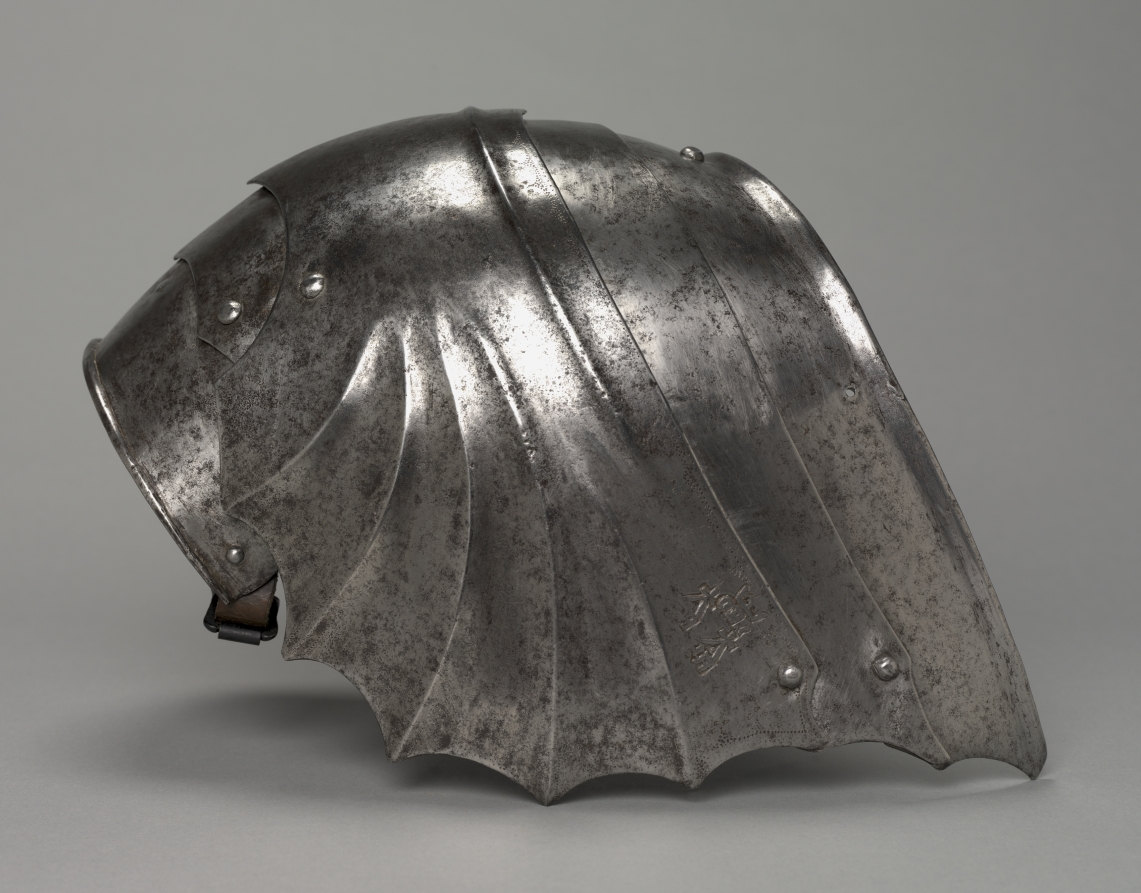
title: Gothic Fan-Shaped Pauldron (left)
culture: Italy, Milan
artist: Antonio Missaglia (Italian, 1416/17–1495/96)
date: c.1485–1500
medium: steel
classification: Arms and Armor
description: When the elements that made up a suit of armor had been forged, shaped, and polished, they were inspected for fit and finish. At this stage the master armorer would use a punch to stamp each element with his maker's mark. Other associated marks might include a town or guild mark, depending on the city of origin. The set of three marks shown here are of a type known to be Milanese. The upper mark seems to show three letters beneath a crown, while the mark below, twice repeated, is a split cross with the letters inside. These probably refer to the Missaglias.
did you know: A pauldron is a component of plate armor that covers the shoulder and often the armpit, and parts of the back and chest as well.